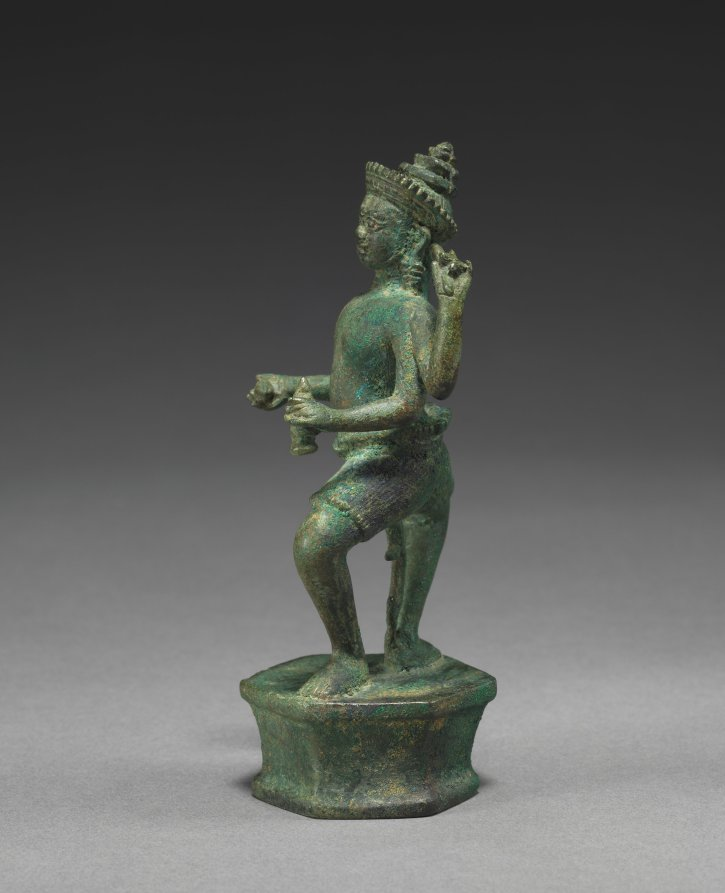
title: Four-Armed Standing Tantric Male Divinity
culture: Cambodia, Koh Ker/Khleang style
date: 925–75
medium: bronze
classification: Sculpture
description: In his four hands, the male tantric deity holds a noose, bell, vajra, and club.